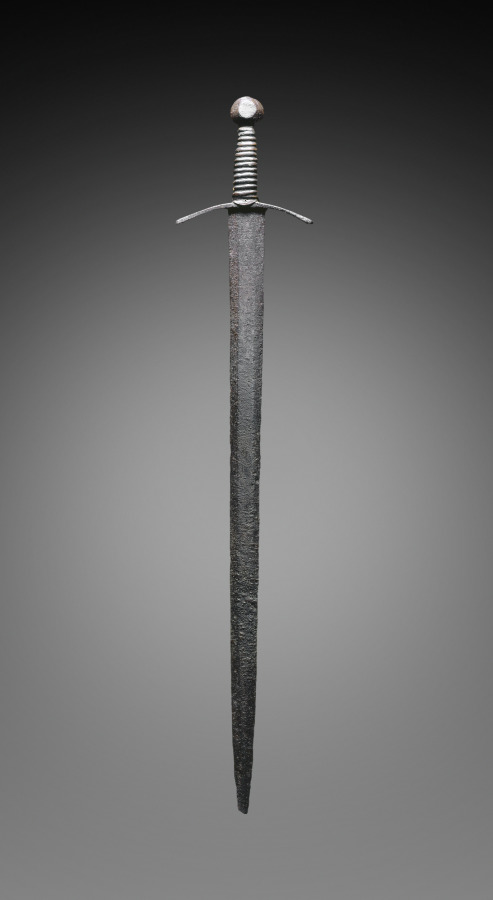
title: Sword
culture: European, early 15th century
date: c. 1400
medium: steel, leather, wire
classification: Arms and Armor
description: The principal weapon of the European knight was his sword, a simple weapon with a broad, two-edged blade, a straight crossguard, and a round pommel or counterweight. The pommel gave the knight full mastery of a perfectly balanced weapon. The basic shape of the sword did not change significantly between 1200 and 1500.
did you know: A sword required a different composition of steel than armor; as a result swordsmithing centers of Europe differ from those that specialized in armor.